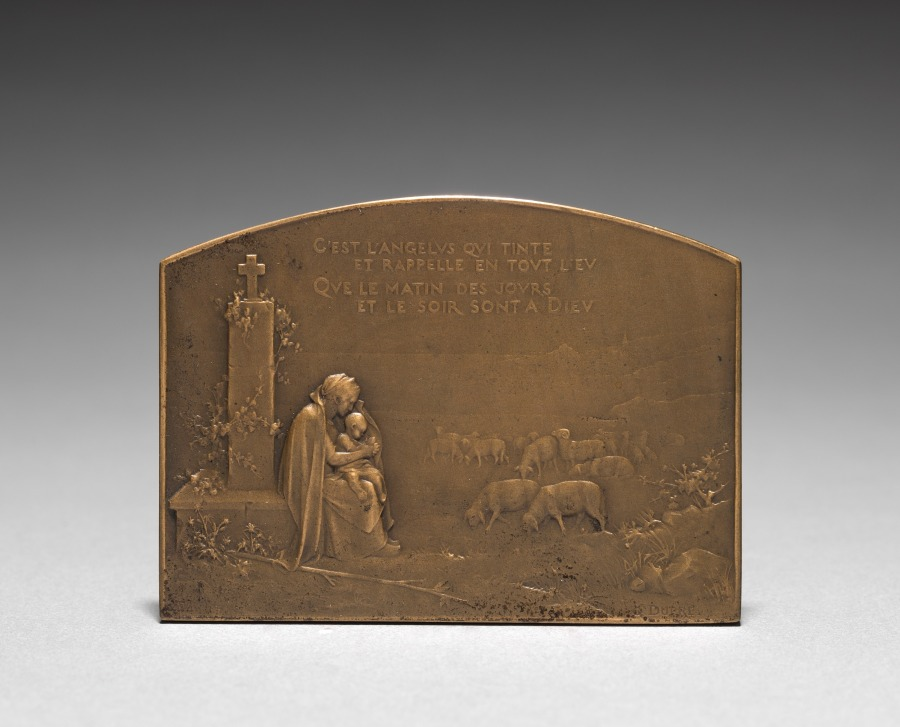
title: Medallion (reverse)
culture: France, 19th-20th century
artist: Jules Dupré (French, 1811–1889)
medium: bronze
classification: Metalwork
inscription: "C'est l'Angelus qui tinte et rappelle en tout lieu que le matin des jours et le soir sont à Dieu" (It is the Angelus which sounds and recalls in every place that the morning and evening of the days are for God); signed: "G. Dupré."